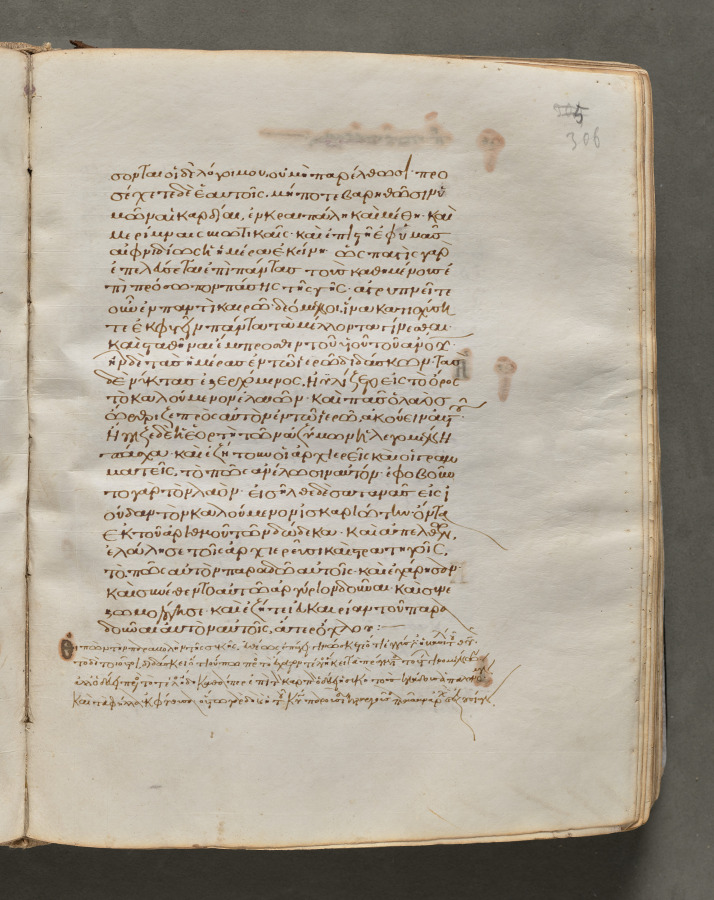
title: Text, folio 306 (recto), from a Gospel Book with Commentaries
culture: Byzantium, Constantinople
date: c. 1000–1100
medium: ink, tempera, and gold on vellum; leather binding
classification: Bound Volume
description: Each of the four gospels in this book opens on a page with brilliantly illuminated borders depicting the author of the text as well as birds—principally peacocks, symbols of the immortality of the soul—and fountains, representing the fountain of life and the salvation of the soul. This volume consists of 428 leaves with texts in Greek. Its level of sophistication suggests that it was probably written and decorated in a monastery in Constantinople.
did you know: Gospel books were carried in procession through Byzantine churches.